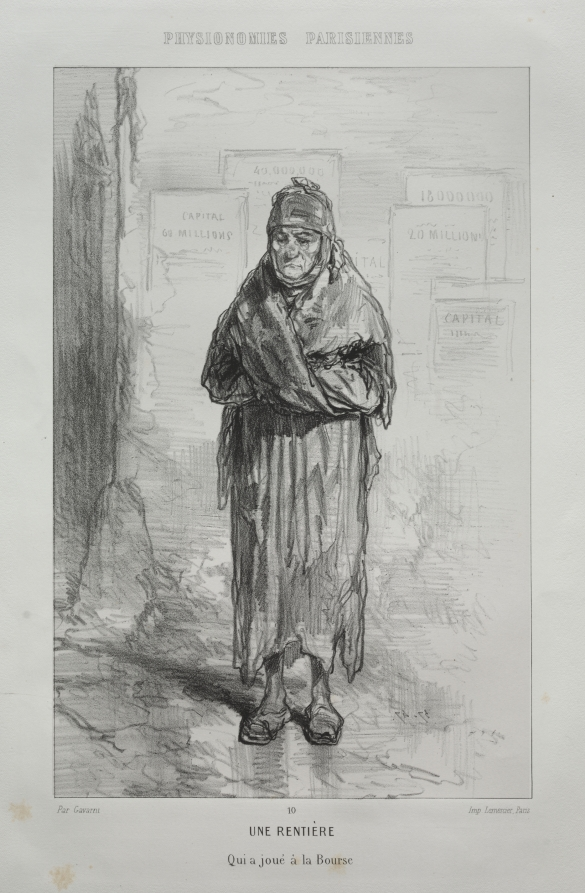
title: Une Rentière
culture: France, 19th century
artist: Paul Gavarni (French, 1804–1866)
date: c. 1857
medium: lithograph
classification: Print